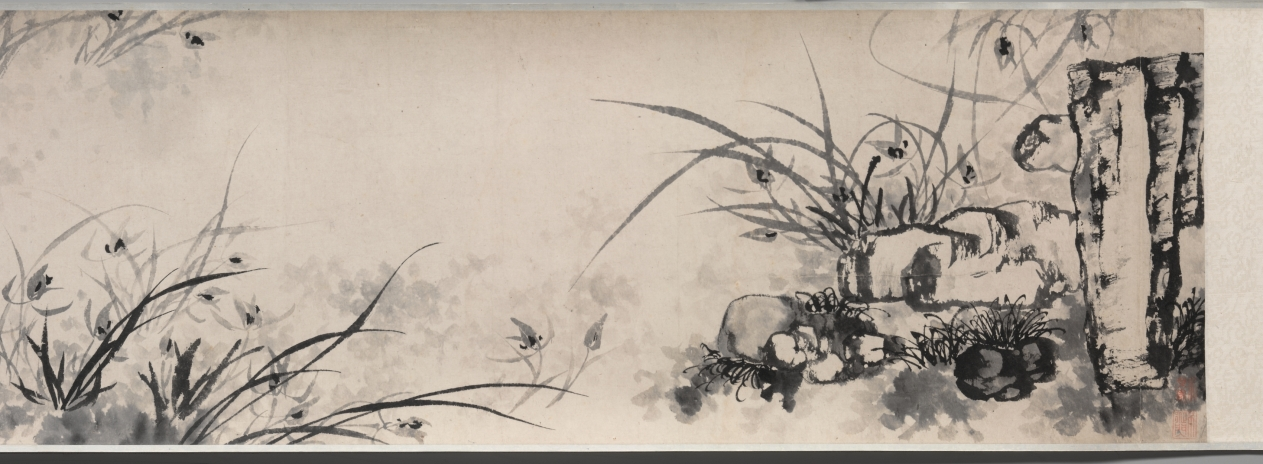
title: Rocks, Orchid, and Bamboo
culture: China, Qing dynasty (1644-1911)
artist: Shitao (Chinese, 1642–1707)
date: 1662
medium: handscroll; ink on paper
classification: Painting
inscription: Title colophon in four characters with signature and two seals on gold-flecked paper.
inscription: Artist's signature, inscription (with date of 1662), five seals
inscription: Colophon with two seals.